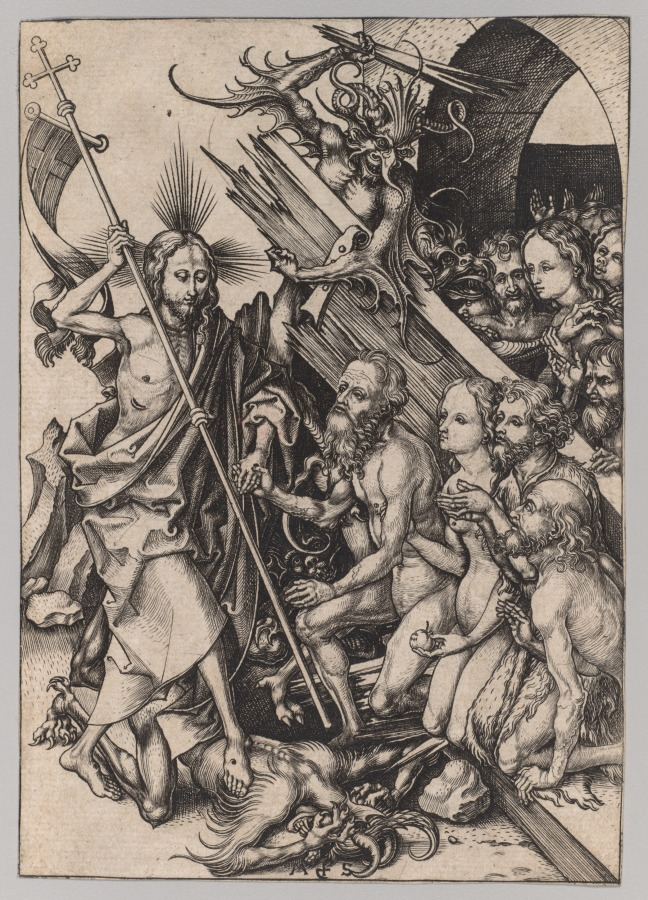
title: The Passion: Christ in Limbo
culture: Germany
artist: Martin Schongauer (German, c. 1450–1491)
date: c. 1480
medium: engraving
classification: Print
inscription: Verso in graphite: c 22202, c 17101, B.G., L.29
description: Martin Schongauer's series The Passion of Christ was his largest set of engravings, made around 1480, and extensively copied across Europe. It consists of 12 prints detailing the suffering of Christ in the last days of his life. Schongauer's version focuses on crowded scenes, grotesque physiognomies of Christ's tormentors, and great pathos in the compositions. Here, Schongauer represented the episode in which Christ, between his death and resurrection, descended into Limbo to bring salvation to the righteous ones who had died before him. Christ majestically strides over a vanquished demon crushed under his foot, and holds Adam's hand with his left hand.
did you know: This image of Christ trampling a monstrous demon and piercing it with his cross recalls the one of Archangel Michael in another print by Martin Schongauer (1952.99).